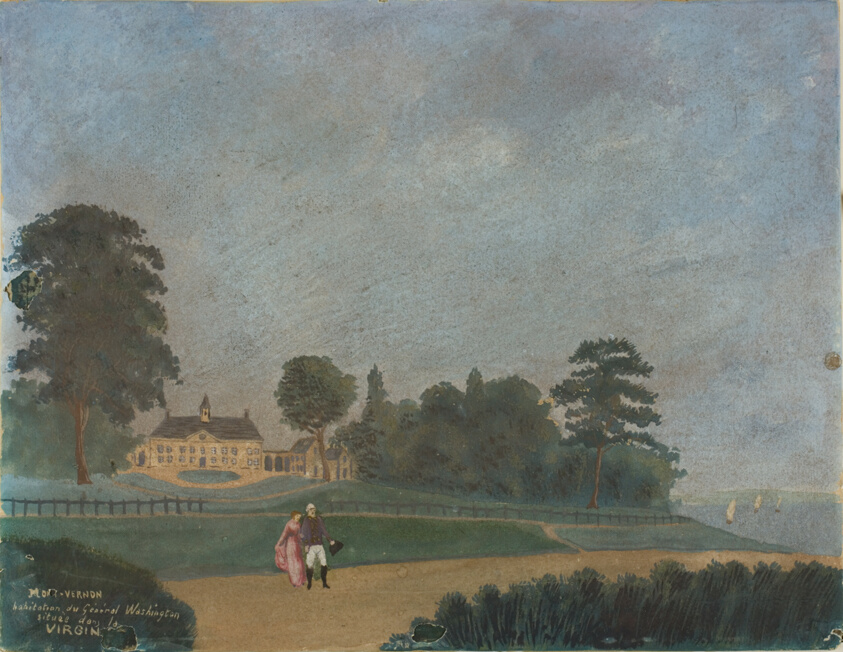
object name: Drawing and Watercolor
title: Mount Vernon, Home of General Washington, Virginia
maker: Unknown Artist; French, 19th century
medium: Gouache on tan wove paper, wrapped around gray board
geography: France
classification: gouache; drawings (visual works); prints and drawing